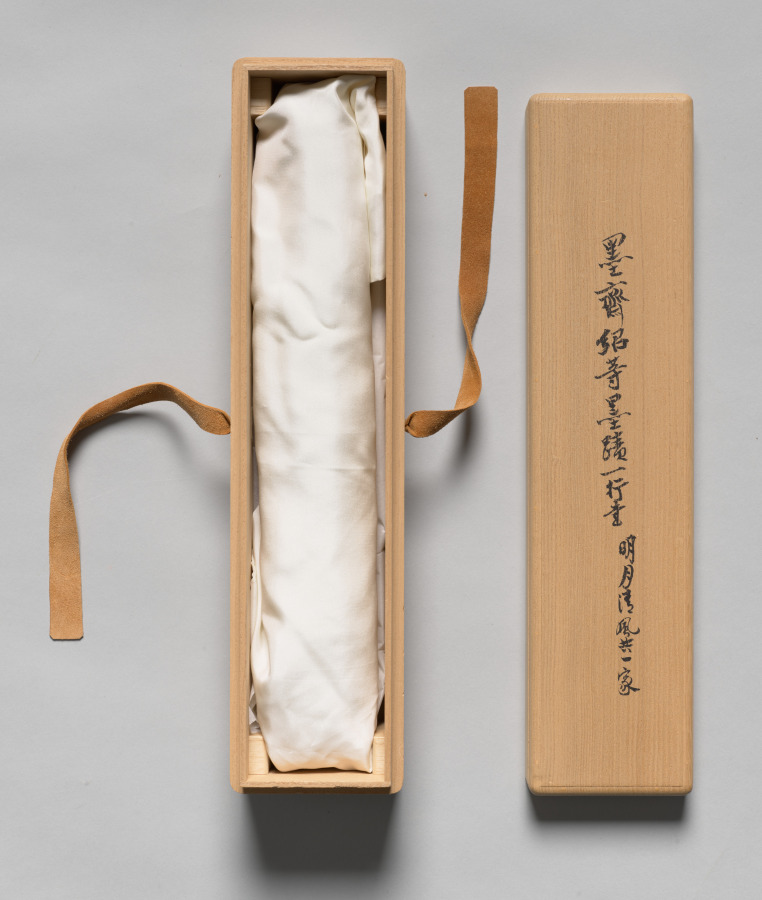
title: Single-column Calligraphy (Bright Moon and Fresh Breath as One . . . )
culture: Japan, Muromachi period (1392–1573)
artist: Motsurin Jōtō (Japanese, d. 1492)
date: 1400s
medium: hanging scroll; ink on paper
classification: Calligraphy